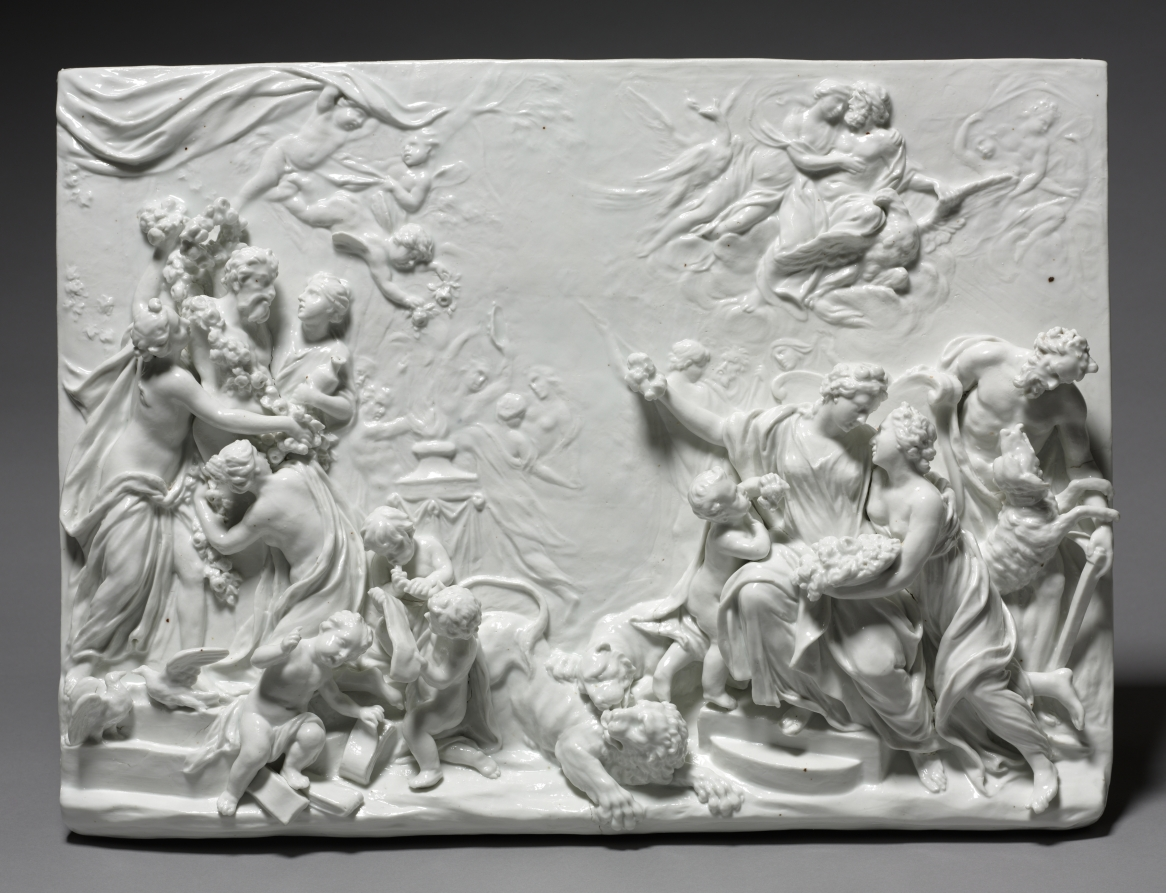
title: Spring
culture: Italy, near Florence, mid-18th century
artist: Doccia Porcelain Factory (Italian)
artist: after a design by Massimiliano Soldani (Italian, 1656–1740)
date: mid-1700s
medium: porcelain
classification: Sculpture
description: Although most 18th-century European porcelain factories produced three-dimensional works, these were often small figures intended to ornament dinner tables or mantelpieces. The factory at Doccia outside Florence was more ambitious, turning to baroque sculptors of the great local tradition to supply models for works in porcelain. In 1743 the factory purchased from the heirs of the famous Florentine sculptor Massimiliano Soldani (1656-1740) a number of that artist's models. Included were models for a series of reliefs representing the four seasons that were created by Soldani in 1708 for Ferdinando de' Medici. One of the reliefs was Spring, or The Realm of Flora, which was then executed in porcelain.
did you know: This relief representing spring includes many creatures: lions, a dog, and an eagle can all be spotted.